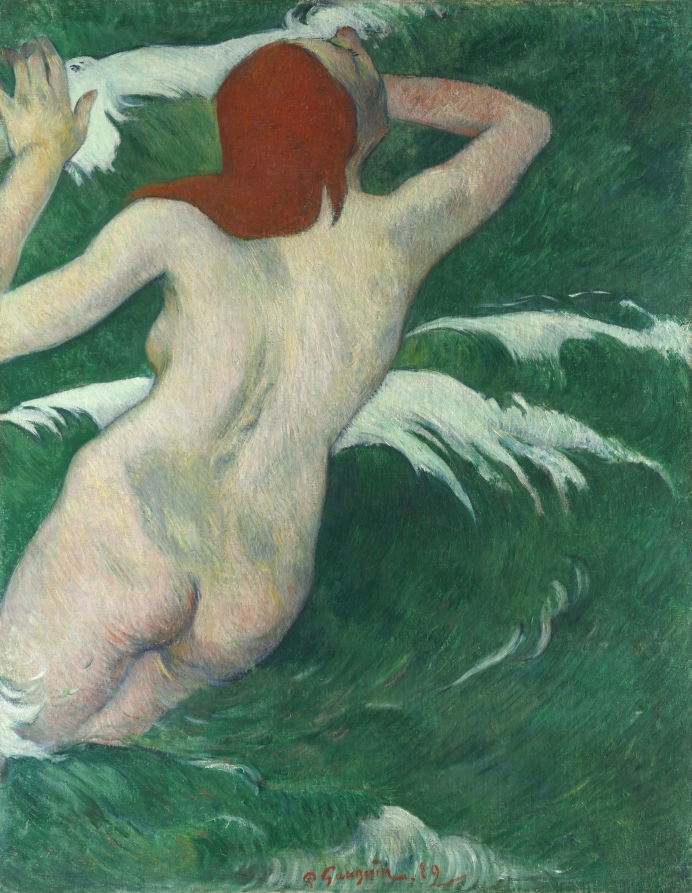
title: In the Waves (Dans les Vagues)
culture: France, 19th century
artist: Paul Gauguin (French, 1848–1903)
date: 1889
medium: oil on fabric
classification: Painting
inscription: Signed lower center: P Gauguin. 89-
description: Painted at Pont-Aven in northwest France, this depiction of a nude figure throwing herself into the sea suggests a metaphor for a modern European woman forsaking civilization and abandoning herself to her natural, primitive instincts. The simplified lines and exaggerated colors, especially the contrasting green and orange, seem invented rather than observed from life. Exhibiting the painting at the Café Volpini in Paris in 1889, Gauguin established himself as a leader of the Symbolist movement in art.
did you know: Gauguin likely painted this work of art during his time in a small coastal village called Pont-Aven where he sought to immerse himself in nature and escape modern civilization.